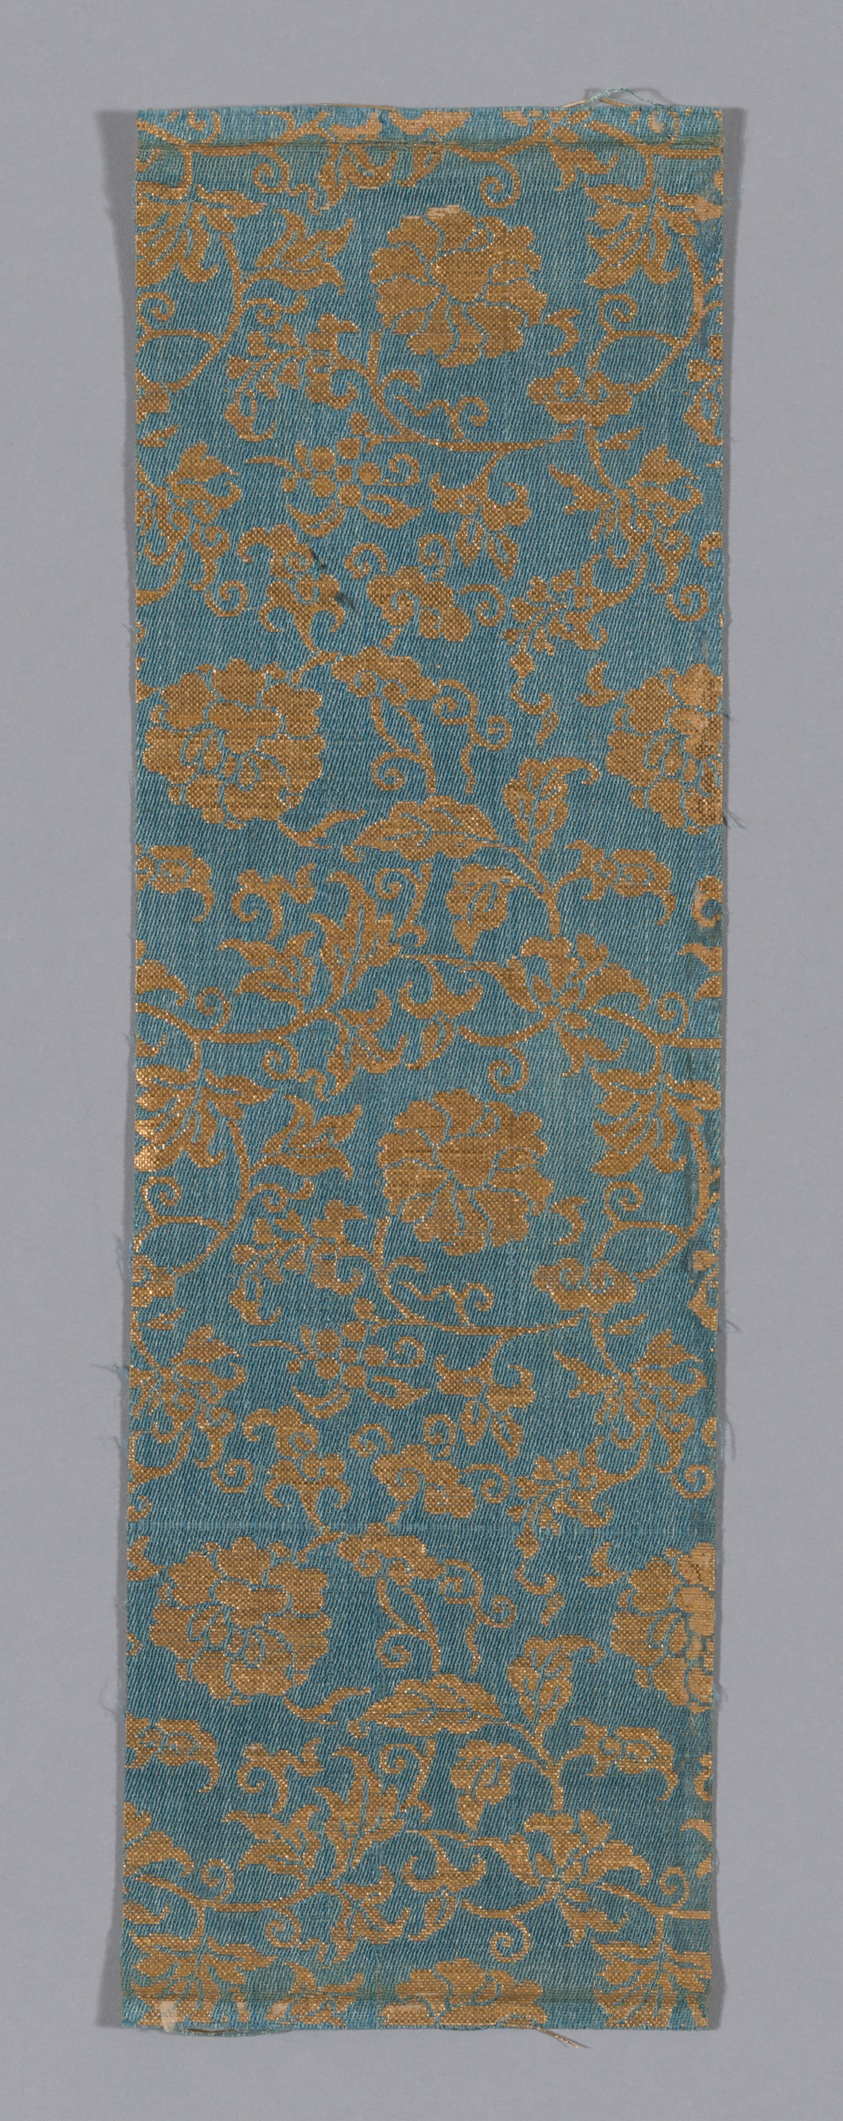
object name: Textile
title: Fragment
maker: Japan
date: 18th century, late Edo period (1789–1868)/ Meiji period (1868–1912)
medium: Plain compound twill, silk and gilt paper; 3 strips to m.m.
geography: Japan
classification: textile; weaving